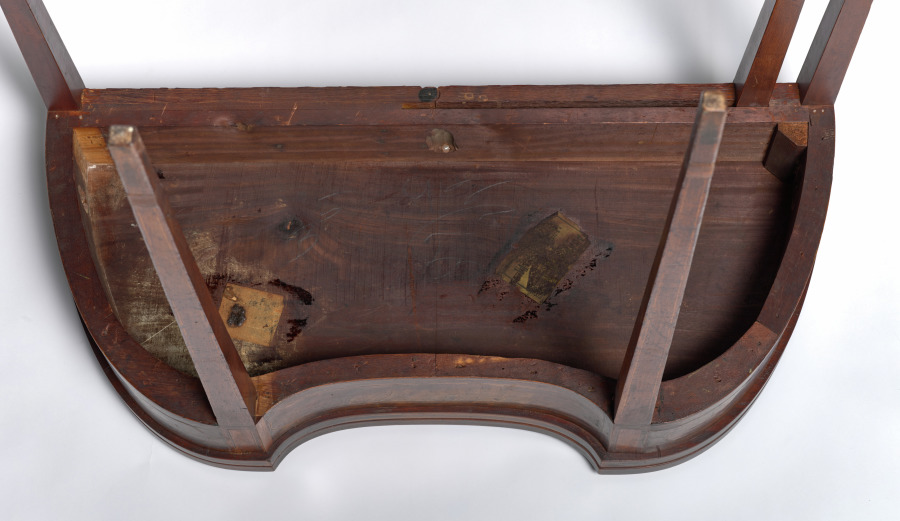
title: Game Table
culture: America, Maryland, Baltimore, early 19th Century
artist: style of George Hepplewhite (American, 1786)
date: c. 1800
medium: mahogany with inlays of various woods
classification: Furniture and woodwork